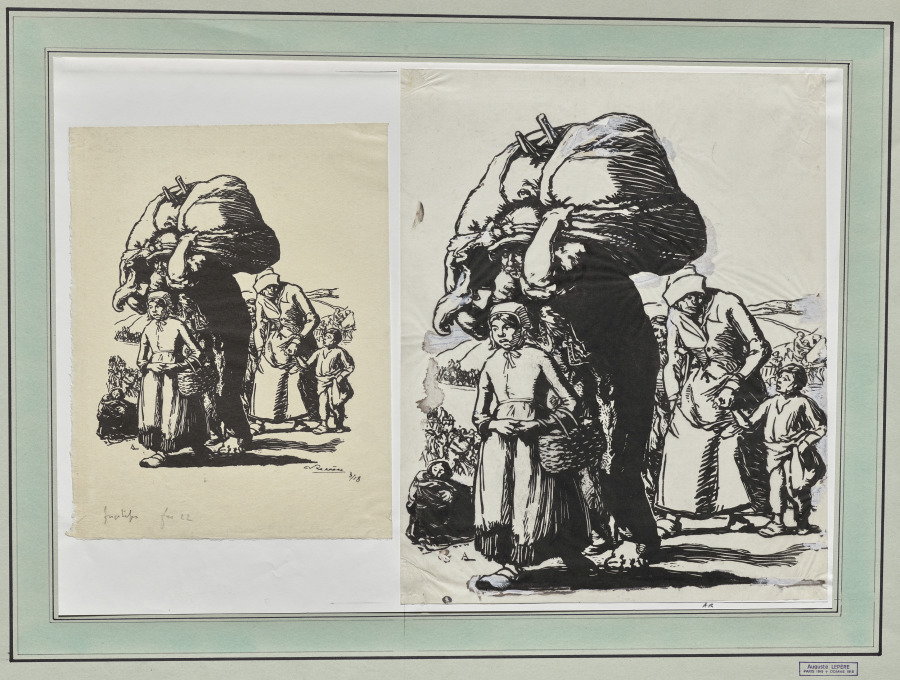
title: Fugitifs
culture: France, 20th century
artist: Auguste Louis Lepère (French, 1849–1918)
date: 1914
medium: woodcut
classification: Print